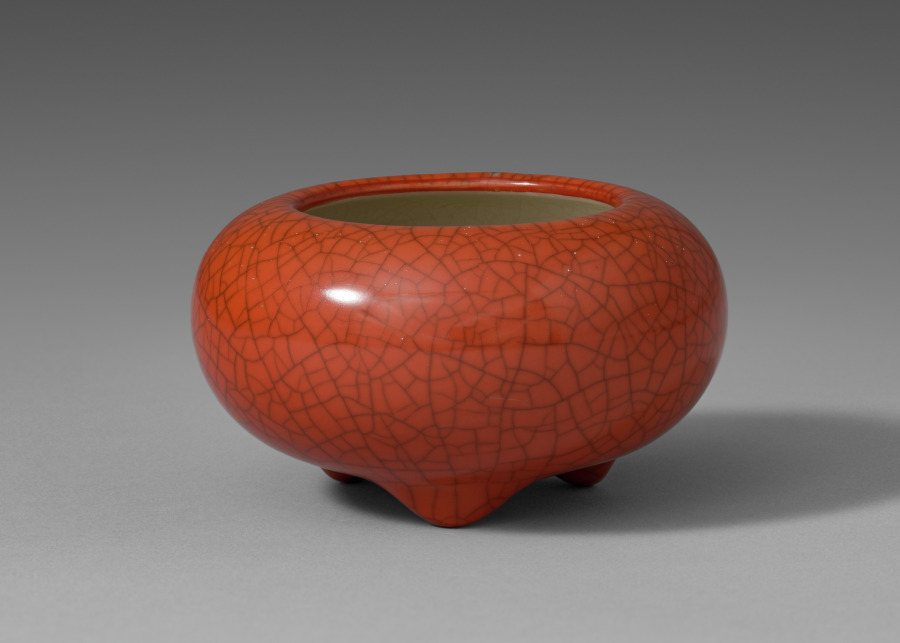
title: Incense Burner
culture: Japan, Meiji period (1868–1912)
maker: Seifū Yohei III (Japanese, 1851–1914)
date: 1893–1914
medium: Porcelain with coral red and crackled glaze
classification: Ceramic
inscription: 清風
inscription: "Hyatt King"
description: The tiniest of containers, this ovoid tripod is an incense burner. It likely once had an openwork metal lid. It is remarkable for its coral red color and crackled glaze. In contrast to the exterior, the interior has been left white under a transparent glaze. The “coral red glaze” is one Yohei III developed in 1887 and called sangōyu. Sensational among colors known at that time, Yohei III won first prize for his work glazed with it at the annual exhibition of the Japan Art Association (Bijutsu Kyokai) in 1888.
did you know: Seifū Yohei III’s incense burner has a red glaze that is difficult to achieve.